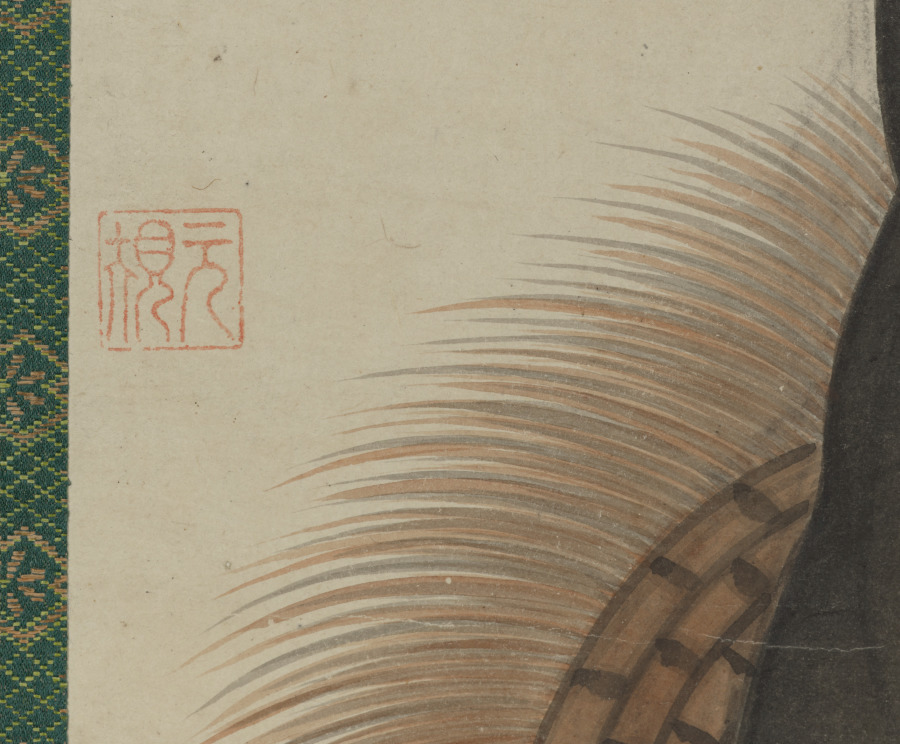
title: Portrait of Duli Xingyi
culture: Japan, Edo period (1615–1868)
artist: Kita Genki (Japanese, active c. 1664–98)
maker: Duli Xingyi (Chinese, 1596–1672)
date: 1671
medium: hanging scroll; ink and color on paper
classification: Painting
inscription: 1671 inscription at top of scroll by Duli Xingyi with three seals, 東矣䪩 (prefatory), 遺世獨立 (top) , 天外一閒人 (bottom); seal of Genki at lower left of painting 元規 .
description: In this portrait, the Ōbaku school Buddhist monk Duli Xingyi (born Tai Li, 1596–1672), whose name is pronounced Dokuryū Shōeki in Japanese, sits upon a woven mat holding a ceremonial scepter known as a ruyi, or nyoi in Japanese. Above his head is an insciption he added to the painting in 1671, the year before his death. It may be translated to read: Contemplative emptiness: the moon suspended over the village at midnight. Suddenly my soul is startled by the howl of an ape. Who could know that it would arouse me beyond my senses, and bring me an inner vision from Mt. Sumeru. (translated by Stephen Addiss and Kwan S. Wong) Originally from what is now the city of Hangzhou in China, Duli emigrated to Japan in 1653, where he took monastic vows. His skills in calligraphy and seal carving were formidable. Painter Kita Genki combined Chinese brush styles he learned in Nagasaki with Western painting techniques to capture Duli's likeness.